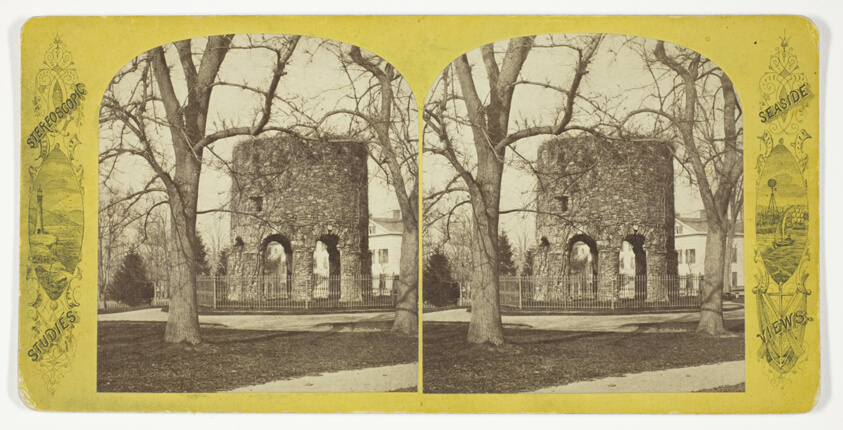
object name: Photograph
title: Old Stone Mill, Newport, Rhode Island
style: 19th century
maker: Artist unknown; American, late 19th century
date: 1875/99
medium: Albumen print, stereo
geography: Rhode Island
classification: photography; photograph